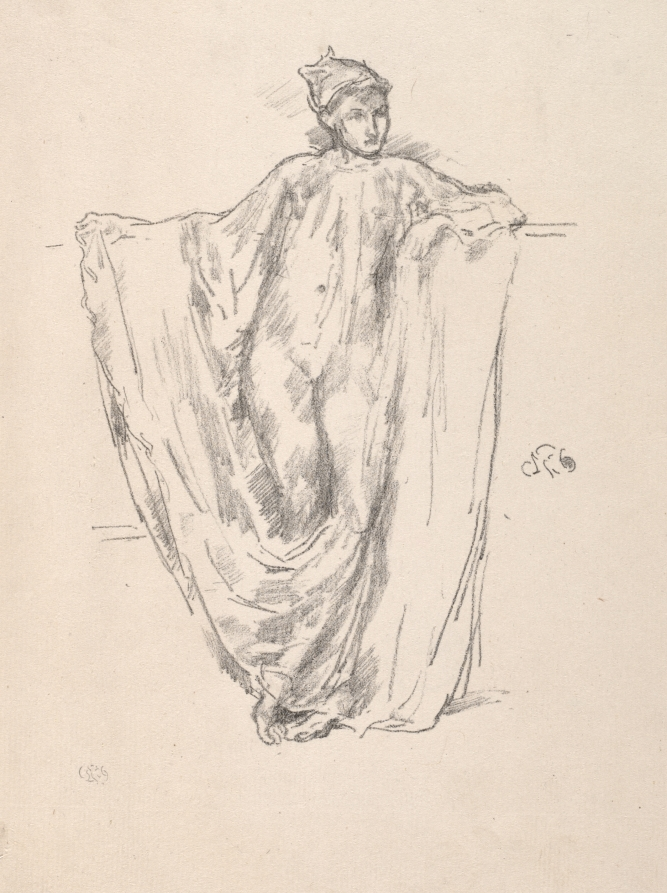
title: Figure Study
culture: America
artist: James McNeill Whistler (American, 1834–1903)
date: 1894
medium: lithograph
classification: Print